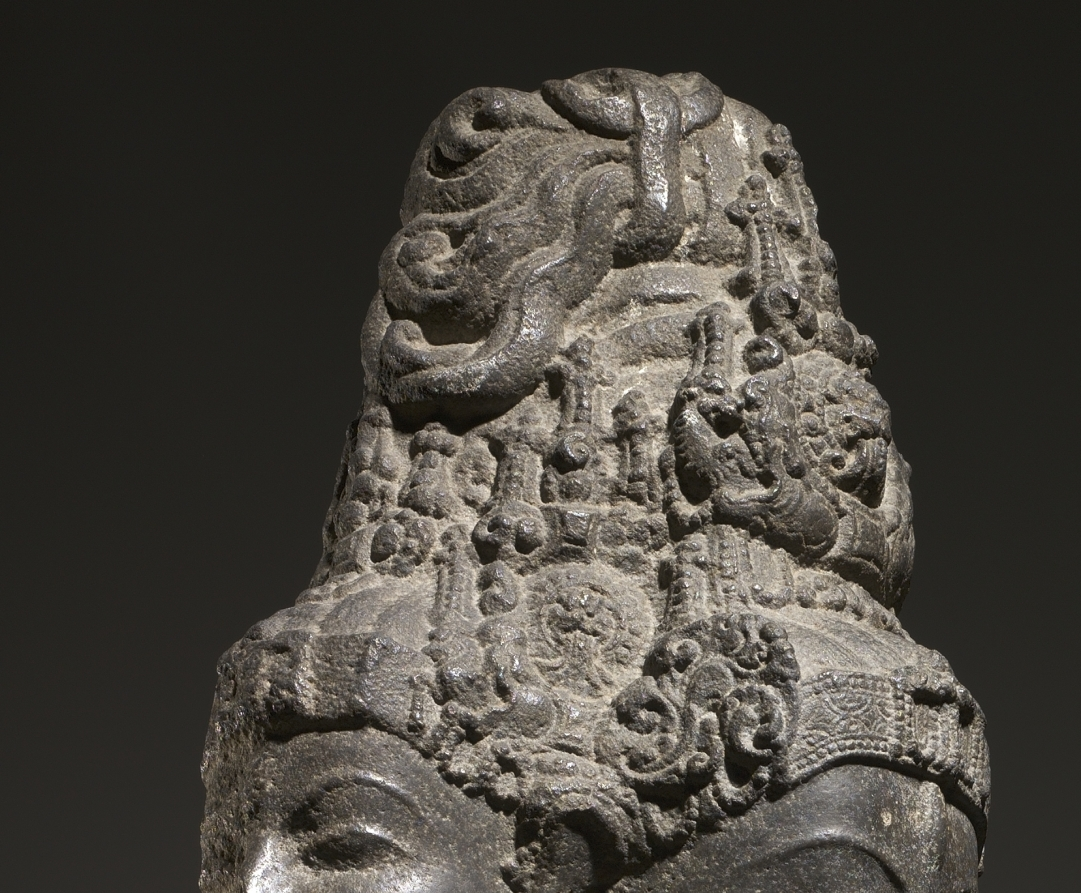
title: Brahma-Shiva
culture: South India, Tamil Nadu, Chola dynasty, late 10th - early 11th century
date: late 900s–1000s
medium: granite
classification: Sculpture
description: In the Hindu pantheon Brahma is in charge of carrying out the work of creation. In this tour-de-force of South Indian temple sculpture, he is in a special regal aspect, with the only elements of his typical priestly appearance being the prayer beads and the matted dreadlocks piled on his head. Four arms connote superhuman power, and four heads convey the idea that his creative activities spread in all four directions. His upper right hand enjoins freedom from fear, and the lower holds a lotus bud associated with birth and the process of creation. His lowered left hand is held in the gift-giving gesture, suggestive of the gift of creation he will bestow upon the world.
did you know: The back of the sculpture retains the original textured surface from a pointed chisel, suggesting it was in a niche or near a wall, protected from worshippers’ touches.